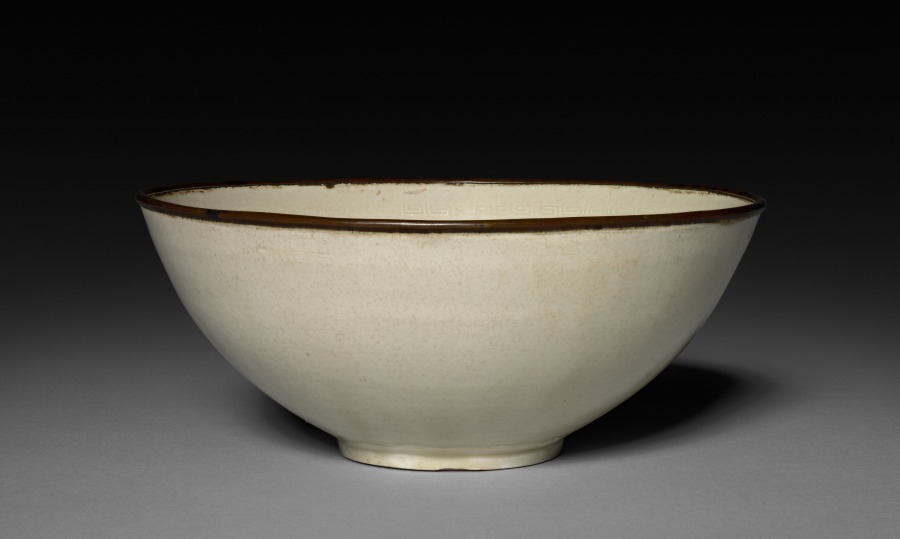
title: Bowl: Ding ware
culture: China, Jin dynasty (1115-1234)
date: 12th-13th Century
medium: glazed white porcelain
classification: Ceramic